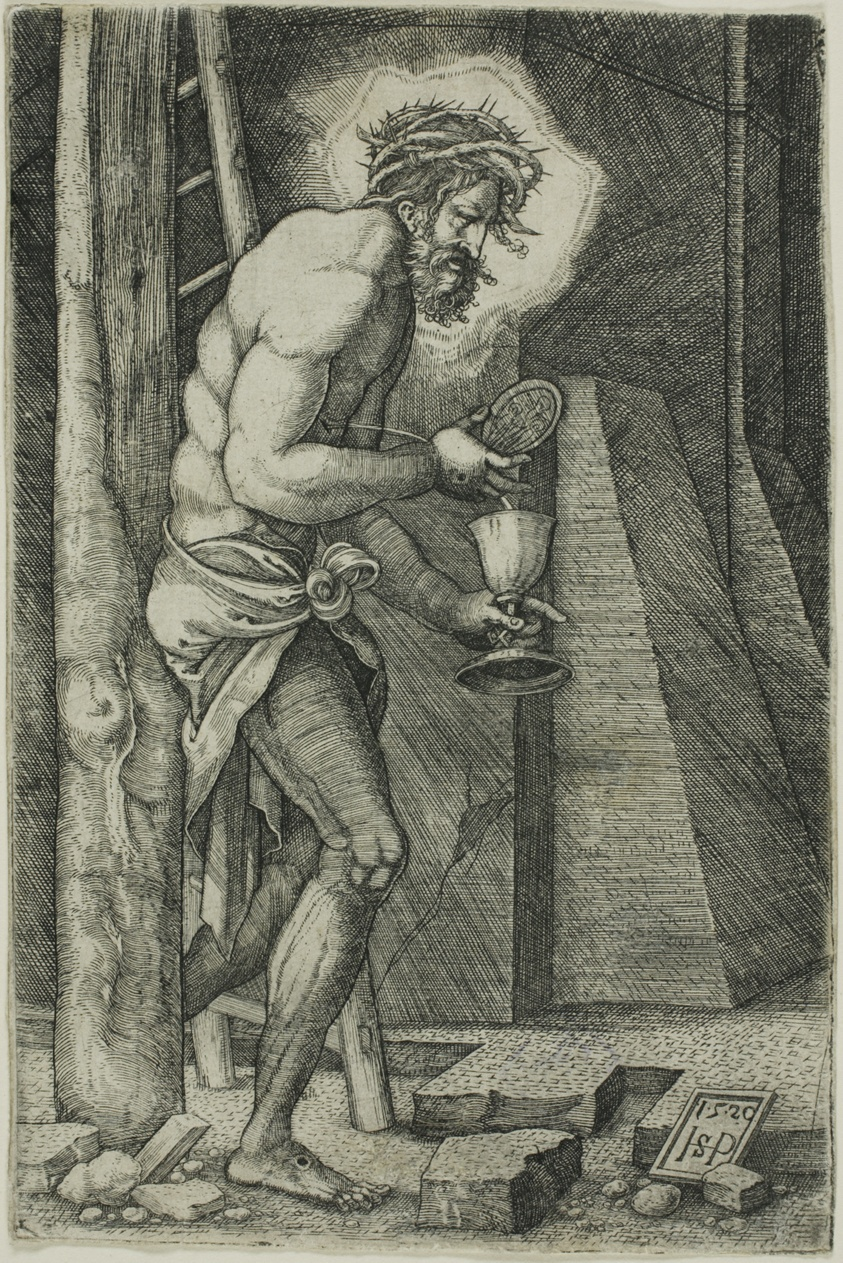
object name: Print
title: The Man of Sorrows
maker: Sebald Beham; German, 1500-1550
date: 1520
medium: Engraving in black on ivory laid paper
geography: Germany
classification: engraving; print; prints and drawing